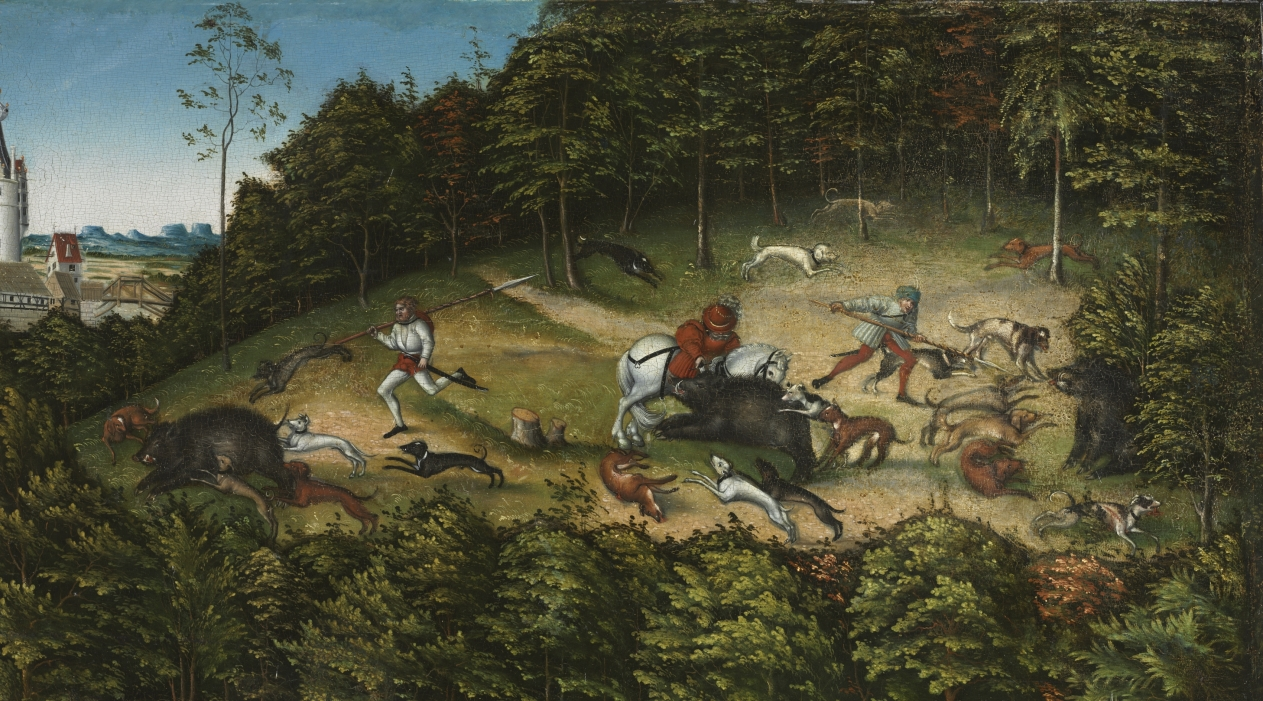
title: Hunting near Hartenfels Castle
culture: Germany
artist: Lucas Cranach (German, 1472–1553)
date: 1540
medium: oil, originally on wood, transferred to masonite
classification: Painting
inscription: Signed lower right on boat with a winged serpent, and dated: 1540 [inventory number, lower right: 1577]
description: The Protestant rulers of Saxony commissioned this animated hunt scene, set near their residence seen in the background, Hartenfels Castle (in eastern Germany). John Frederick the Magnanimous, in the bottom left corner, wears dark green hunting attire; he spans his crossbow and waits for his courtiers and dogs to chase a stag across the river. His wife, the Electress Sibylle, stands at right, poised to take the first ceremonial shot. The prince electors of Saxony were passionate practitioners of hunting with dogs—elaborate, highly rehearsed occasions, coordinated by the use of signals from hunting horns. Cranach dated this work and his signature is the winged snake at lower right. 1577 in the right corner is an inventory number.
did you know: Humans, dogs, and deer make up most of the creatures in this busy scene—but not all of them! Look closely at the background to spot a bear and three boars.